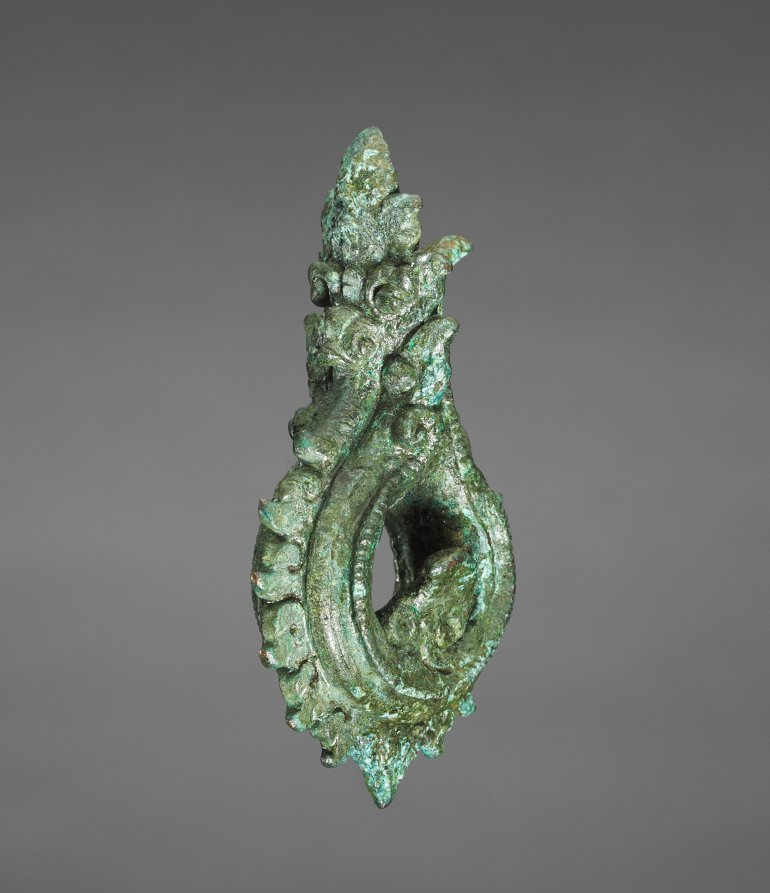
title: Earring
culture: Cambodia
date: 1200s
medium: bronze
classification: Jewelry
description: This earring is in the form of naga, or water serpent, one of the most popular decorative motifs in Cambodian art. While bronze objects such as furniture and palanquin fittings and finials, hooks, rings, etc., were among the most typical items of the classical Angkorean art (12th–13th century), jewelry is very rare. Originally, it must have been gilt. It is conceivable that this earring may not have been used as a regular ear ornament but enhanced a Khmer sculpture, a common practice, which would explain their heavy weight and large size.